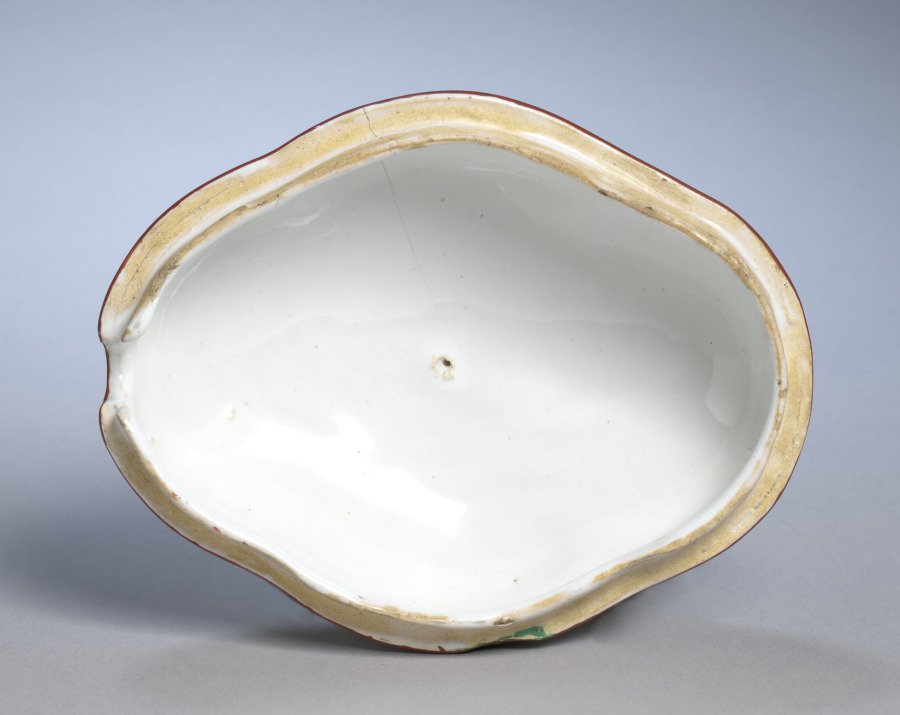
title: Sugar Basin (lid)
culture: France, 18th century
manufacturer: Sceaux Factory (French, active 1748–66)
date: c. 1750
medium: faience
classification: Ceramic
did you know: In medieval Italian churches, painted altarpieces served as a focal point for worshippers during the rituals of faith. The figures of Jesus, Mary, and eight saints are framed by a golden background that would have glistened in the flickering candlelight of the church.